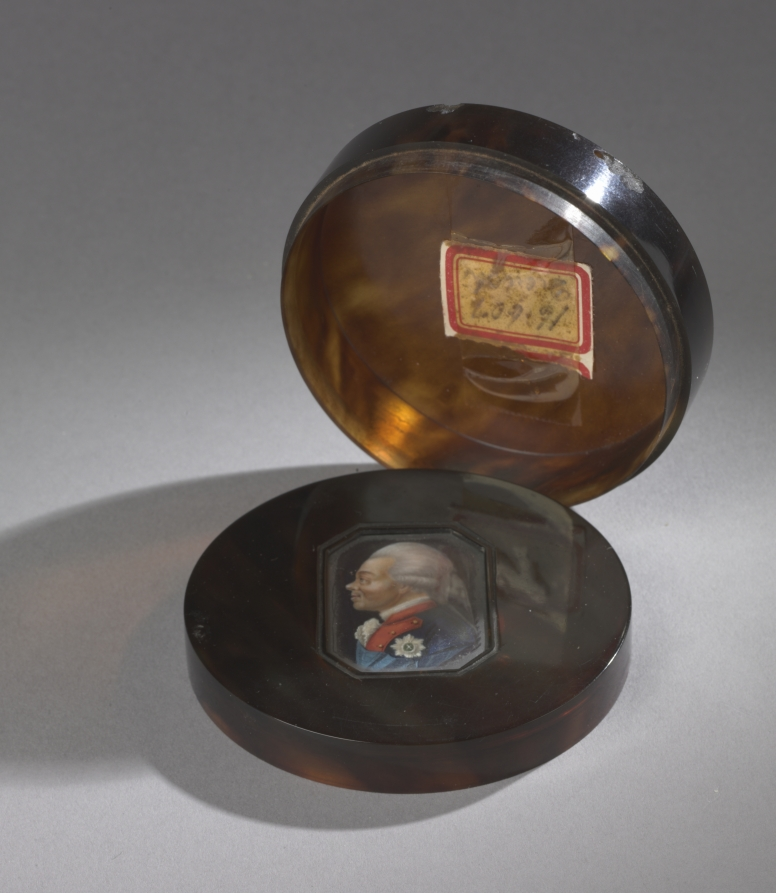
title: Snuff Box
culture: Continental, early 19th century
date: c. 1800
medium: tortoiseshell box with painted portrait miniature under glass, inset on cover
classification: Miscellaneous